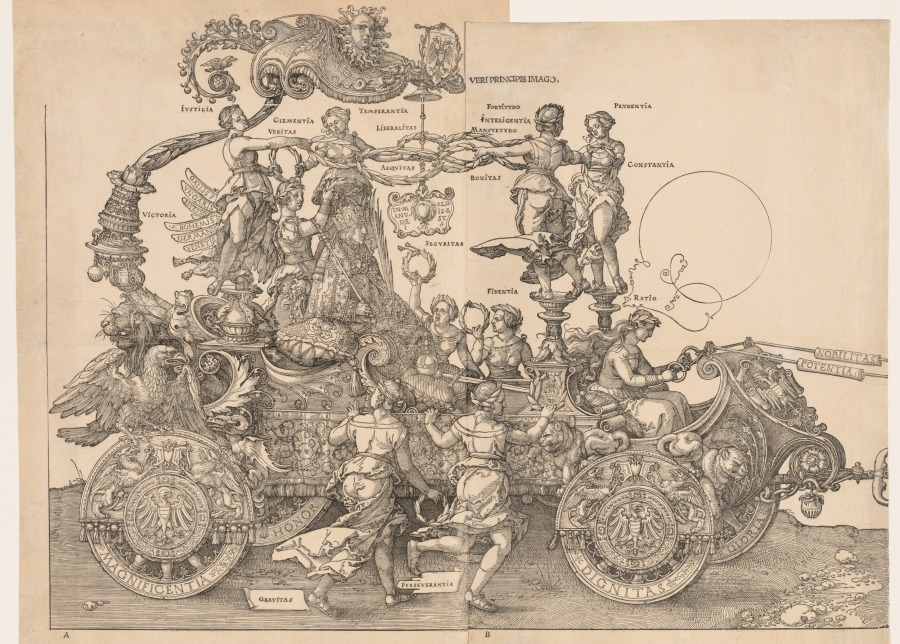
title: The Great Triumphal Car of Emperor Maximilian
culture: Germany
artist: Albrecht Dürer (German, 1471–1528)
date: 1523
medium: woodcut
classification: Print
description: Dürer conceived this fantastical chariot as part of a larger commission to depict Holy Roman Emperor Maximilian I (reigned 1486–1519) in a triumphal procession. The ruler sits enthroned in the lavish car, as Victory holds a laurel wreath above his imperial crown. Her feathered wings list Maximilian’s military campaigns. Nearly every component of the allegorical pageant—from the entourage of female attendants to the laurel garlands—has a Latin label describing honorable qualities of an ideal prince. The car rolls on wheels of Magnificence, Honor, Dignity, and Glory. Its driver is Reason, who guides a team of 12 horses with reins of Nobility and Power. Virtues of Justice, Strength, Wisdom, and Temperance, stand on pedestals arranged around the emperor. Maximilian died in 1519, before the ambitious commission could be completed. Dürer published The Great Triumphal Car at his own expense with text composed by his friend Willibald Pirckheimer (1470–1530).